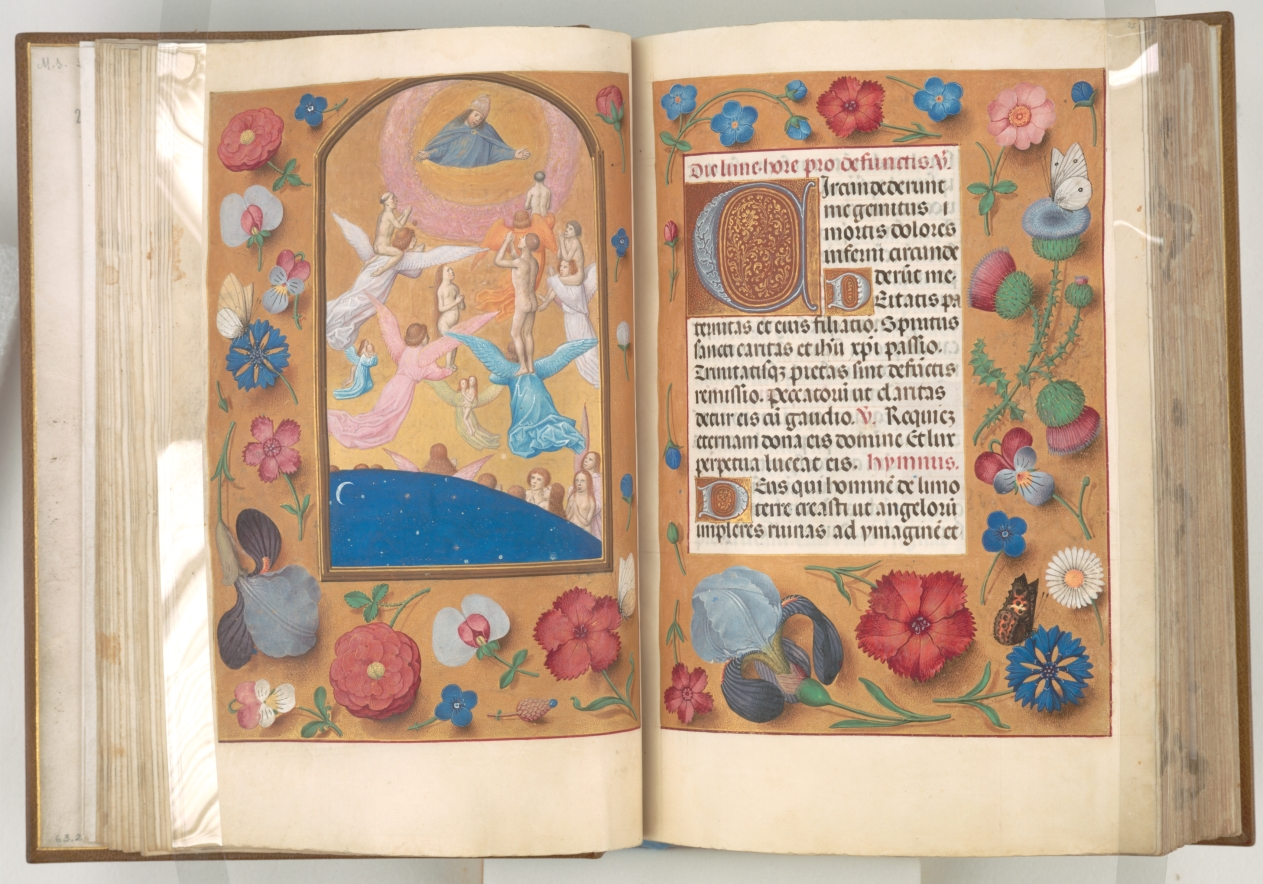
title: Hours of Queen Isabella the Catholic, Queen of Spain: Fol. 24v, Souls of the Saved Brought to Heaven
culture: Flanders, Ghent and Bruges, late 15th century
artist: Master of the First Prayerbook of Maximillian (Flemish, c. 1444–1519)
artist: and Associates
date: c. 1500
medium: ink, tempera, and gold on vellum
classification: Bound Volume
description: A great lover of Flemish art, Queen Isabella treasured her many devotional books. This deluxe manuscript was created for her private devotions by highly organized and distinctly talented manuscript painters active in Ghent and Bruges. The Ghent-Bruges school represents the culmination of Flemish book painting, whose main features were the use of rich colors, illusionistic effects, a love of landscape, and a strong sense of visual narrative. Manuscripts produced by this circle of artists are renowned for their border decoration featuring a rich variety of realistically painted flowers, scrolling acanthus leaves, birds, and butterflies.